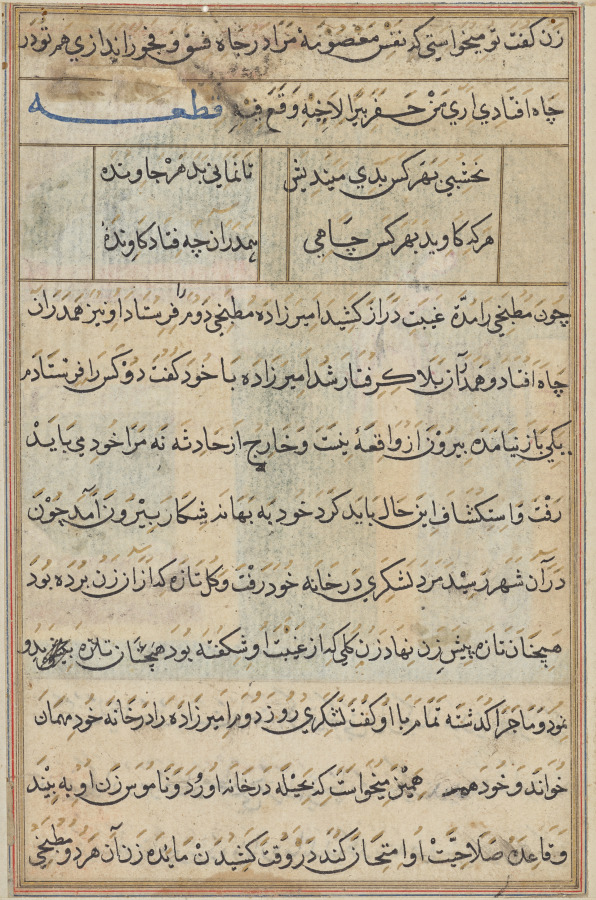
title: Page from Tales of a Parrot (Tuti-nama): text page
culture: Mughal India, court of Akbar (reigned 1556–1605)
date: c. 1560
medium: gum tempera, ink, and gold on paper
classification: Painting